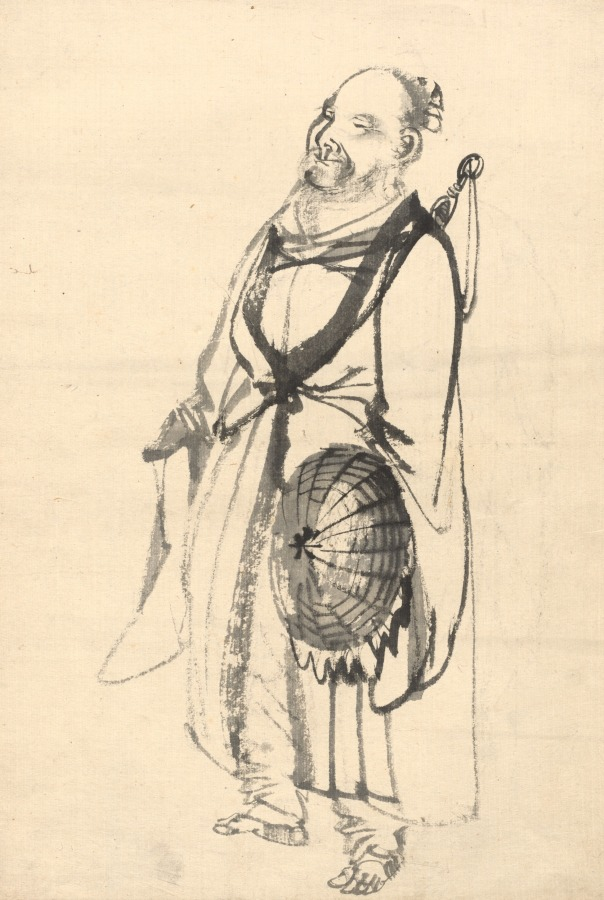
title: The Wandering Hermit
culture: Japan, Meiji period (1868–1912)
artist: attributed to Kono Bairei (Japanese, 1844–1895)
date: c. 1880–95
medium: ink on paper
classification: Drawing